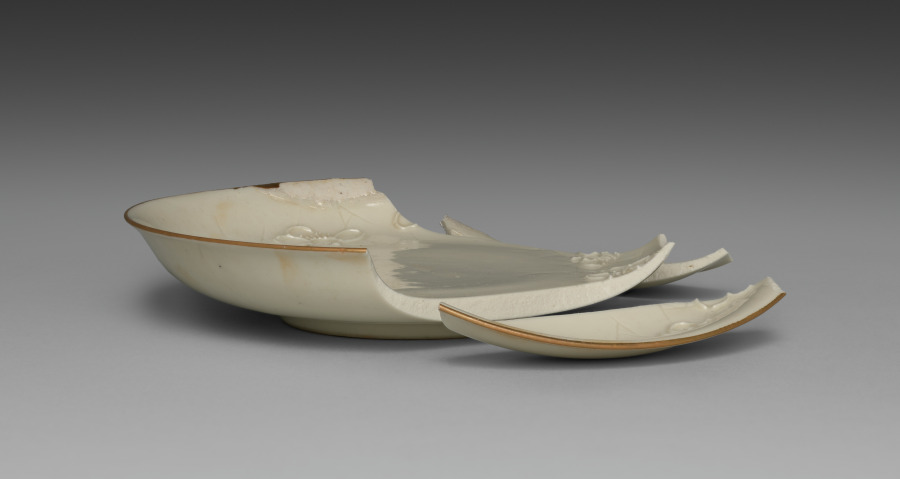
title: Medium-sized Dish from Dining Set with Plum Blossoms and Cracked-Ice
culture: Japan, Meiji period (1868–1912)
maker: Seifū Yohei II (Japanese, 1844–1878)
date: c. 1875–78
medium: Porcelain with molded designs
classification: Ceramic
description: Each item in this set has a delicate low-relief design of flowering plum branches over scattered, intersecting lines meant to resemble the cracked-ice surface of a frozen body of water and is signed on the base in gold pigment. While Yohei II produced many fine works in underglaze blue, like those produced by Kiyomizu Shichibei, he also made works in quite different styles later in his career, from the early 1870 s. In 1873, he was appointed purveyor to the Industrial Center of Kyoto Prefecture, a designation associated with Kyoto’s efforts to reach an international market through the port of Kobe; and from 1875 until his death, he was involved in national-level projects to present Japanese ceramics across the world. It was during this period that Yohei III was apprenticed to Yohei II, and it has been suggested that this set may in fact be an early example of Yohei III’s work, which he signed with his teacher’s name. Decorated with flowers resembling Japanese textile motifs, the set calls to mind the design of Yohei II’s pair of vases with plum blossoms in the Victoria and Albert Museum. Here, the elaborate trees created for a formal public exhibition setting have been translated into the approachable blossoms of the genteel domestic environment. While the designs are consistent across the pieces, each raised flower petal and pistil and each incised line in the ice was done by hand, so the cups, bowls, and dishes are similar yet unique. The bottoms of two boxes once identified the set’s owner, but the information has been deliberately obscured with black ink. However, inscriptions still visible appear to indicate two occasions, once at the end of July 1886 , and once again in June 1916 , when parts of the set were requested from Hokura in Niigata Prefecture. The location corresponds to a neighborhood in the present-day city of Jōetsu. The surname Tsuji 辻 also appears on a paper tag affixed to one of the box cloths. Future research may possibly reveal more about their provenance. A vase by Yohei III in a private collection combines the formal grandeur of the Yohei II vases in the Victoria and Albert Museum with the gentler design of this dining set, placing flowering plum trees against soft, scalloped-edge clouds resembling those in golden screens.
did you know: The dining wares have a creamy white coloration that the four boxes containing them identify as Korean in style.